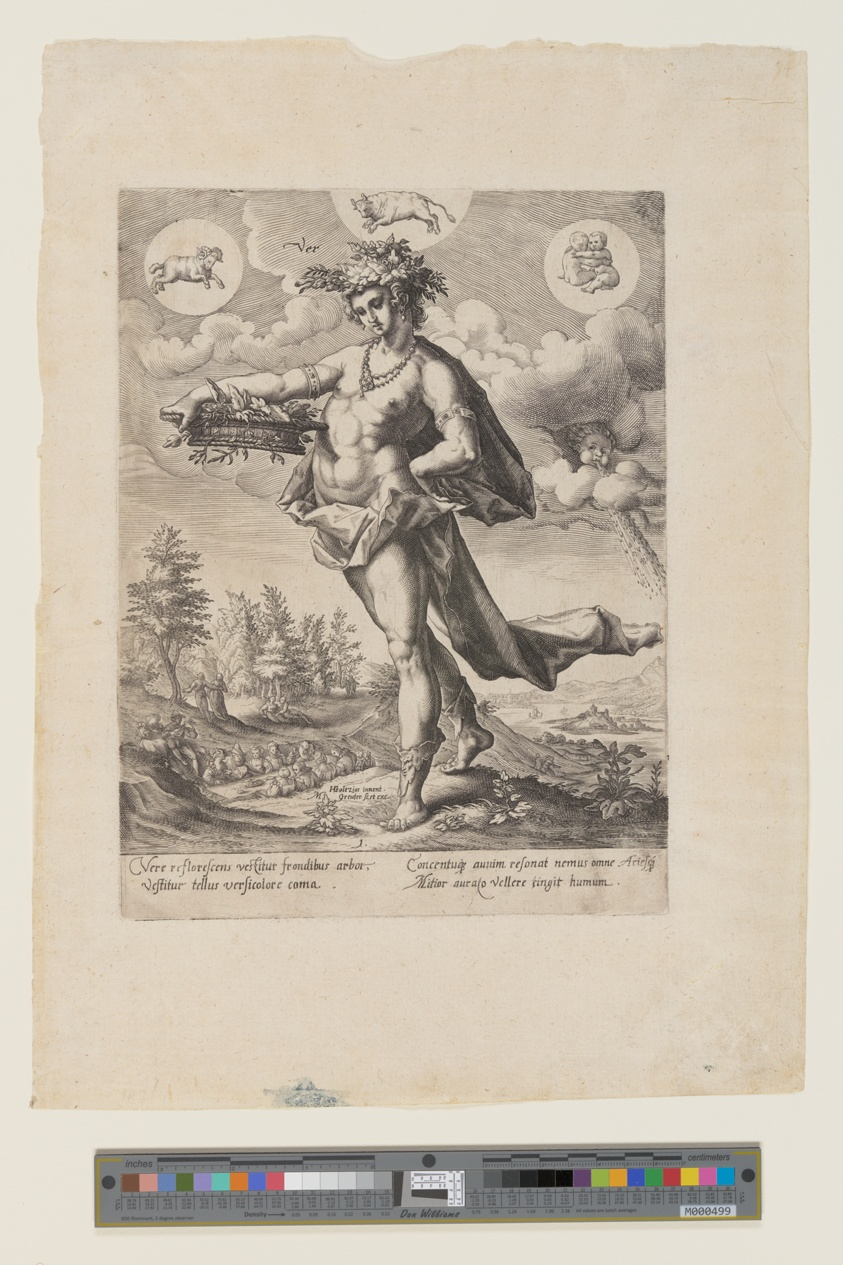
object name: Print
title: Spring, from The Four Seasons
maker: Matthäus Greuter (German, 1564 or 1566–1638); after Hendrick Goltzius (Dutch, 1558–1617)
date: c. 1589-1600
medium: Engraving on ivory laid paper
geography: Germany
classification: engraving; paper; print; prints and drawing